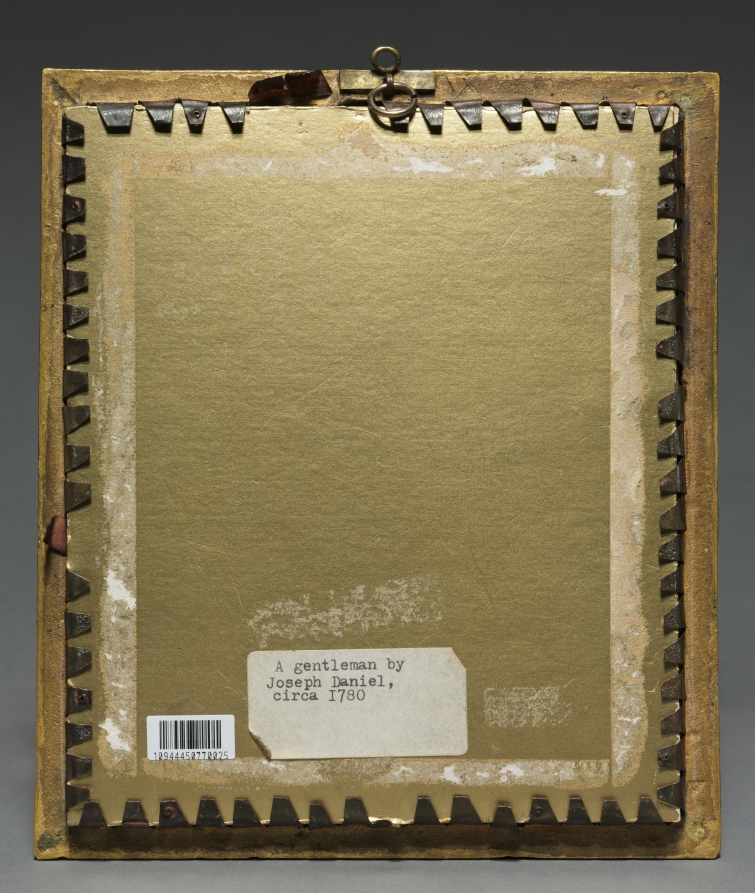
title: Portrait of a Man Holding a Glass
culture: England, late 18th century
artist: Joseph Daniel (British, c. 1760–1803)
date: c. 1780s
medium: watercolor on ivory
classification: Portrait Miniature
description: Joseph Daniel was the son Nochaniah Daniel of Bridgewater, Somerset, and among the first known Jewish artists of South West England. Joseph’s work has often been confused with that of his brother Abraham, with whom he competed for patronage. Neither commonly used his forename in signature nor in advertisement, possibly with a view to capitalize on the other’s clientele. Little is known about the brothers’ education apart from the fact that they were trained by their mother. Joseph seldom exhibited his miniatures in public. Only in recent years has there been an increased confidence in distinguishing his works from those of Abraham, resulting from the discovery of a handful of miniatures signed with first initials. The primary distinction between their styles is usually cited as Joseph’s greater attention to detail and his use of gray tones in shading. This outstanding miniature dating from the 1780s is unsigned, as was typical of Daniel’s practice. The sitter is conventionally dressed, wearing a powdered wig and a cream-colored cravat and waistcoat under a dark brown frock coat against which the delicacy of the translucent frilled cuffs is especially pronounced. There is evidence on the painted surface that Daniel adjusted the position of the index finger on the man’s left hand as well as the rightmost curls of his wig. The background is a mottled rusty brown, spot lit to pale brown in the center. The pallor of the sitter’s face, framed by gray hair and a blanched background, reinforces the intensity of his dark eyes, which confront the viewer directly. The face is sensitively described with broad gray shadows. Daniel’s attention to detail is evident in the reflection of the window in the curved glass of the goblet. The goblet, while acting as a central element in the picture, is not a refined object; instead, it is a heavy, plain vessel significant for its contents: water from Bath’s natural hot springs. This type of virtuoso portrait may have been displayed in the artist’s studio to attract clients and refers to the spa culture of Bath, a critical site for social maneuvering in eighteenth- and early-nineteenth-century England.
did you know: While some highly successful artists were able to support themselves by working only in miniature, it was more common for them to work in a variety of media like Joseph Daniel who was a miniature painter, engraver, and jeweler who also executed pictures in oil, crayon, and hairwork.